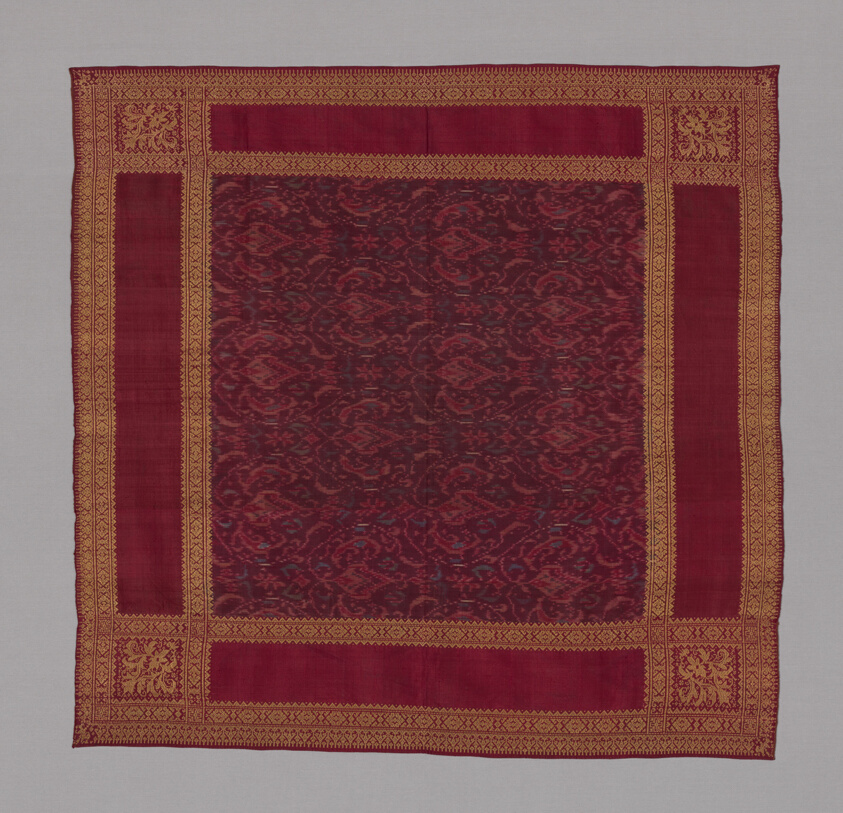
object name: Costume and Accessories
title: Iket (Headcloth)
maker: Indonesia, Sumatra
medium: Center in formalized floral design woven by tied-dye process known as ikat, giving effect of shot silk; colors blue, green, black and light reds; two borders in gold thread in geometric design; corners have floral motif in gold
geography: Sumatra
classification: textile; weaving; weaving - printed; costume; dress (garment); clothing